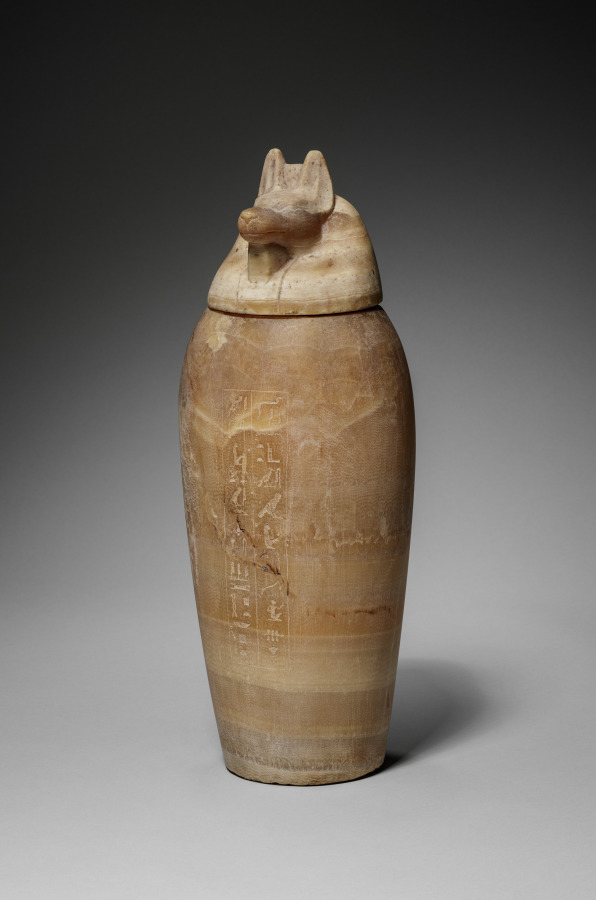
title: Canopic Jar with Jackal's Head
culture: Egypt, Late period (715–332 BCE), Dynasty 26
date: 664–525 BCE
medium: travertine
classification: Funerary Equipment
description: In the process of mummification, the liver, lungs, stomach, and intestines were removed, separately embalmed, and stored in specialized jars known as canopic jars (after a sailor in Greek mythology, who died at the town of Canopus in the Nile Delta and was worshipped there in the form of a human-headed jar). Each organ was identified with one of four funerary deities collectively known as the Sons of Horus: the liver with Imsety (man's head), the lungs with Hapy (baboon's head), the stomach with Duamutef (jackal's head), and the intestines with Qebehsenuef (falcon's head). It was their duty to protect the deceased and restore to him his body parts in the hereafter.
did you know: This jar is made of travertine stone-- subtle in color and with a captivating natural pattern-- with hieroglyphics carved on the front. Such jars were used to hold internal organs of the deceased and to preserve them for the afterlife.